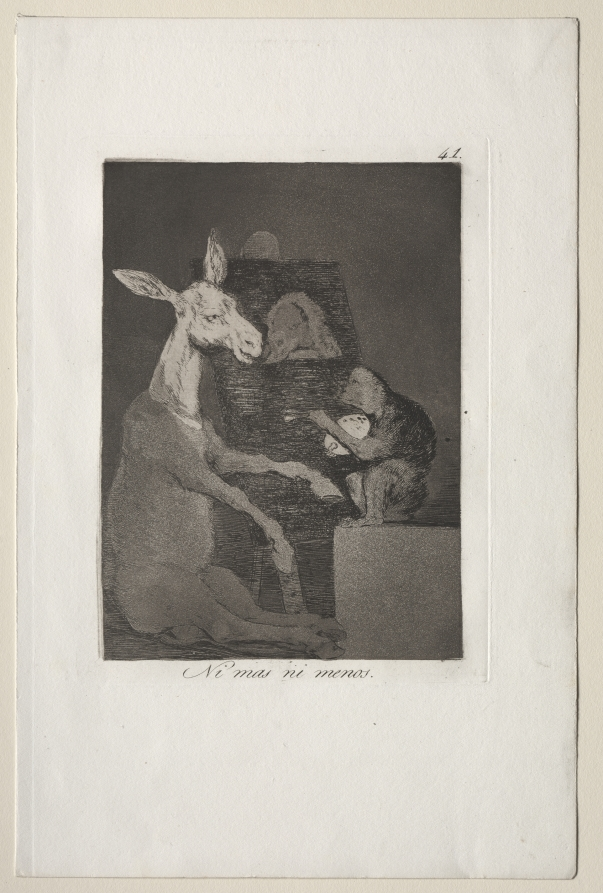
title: Neither More Nor Less, Plate 41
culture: Spain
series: Los Caprichos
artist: Francisco de Goya (Spanish, 1746–1828)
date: 1799, printed c. 1855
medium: etching and aquatint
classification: Print